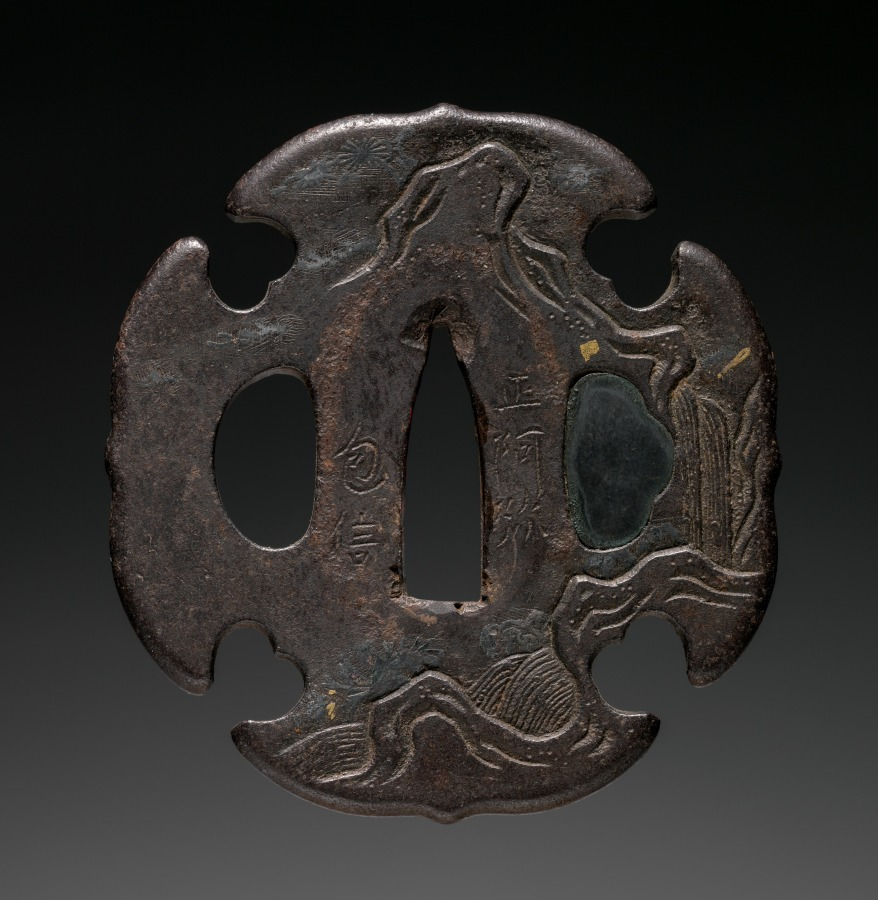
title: Sword Guard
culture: Japan, Edo period (1615–1868)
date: early 1800s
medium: iron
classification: Arms and Armor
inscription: Signature: Shoami Kanenobu